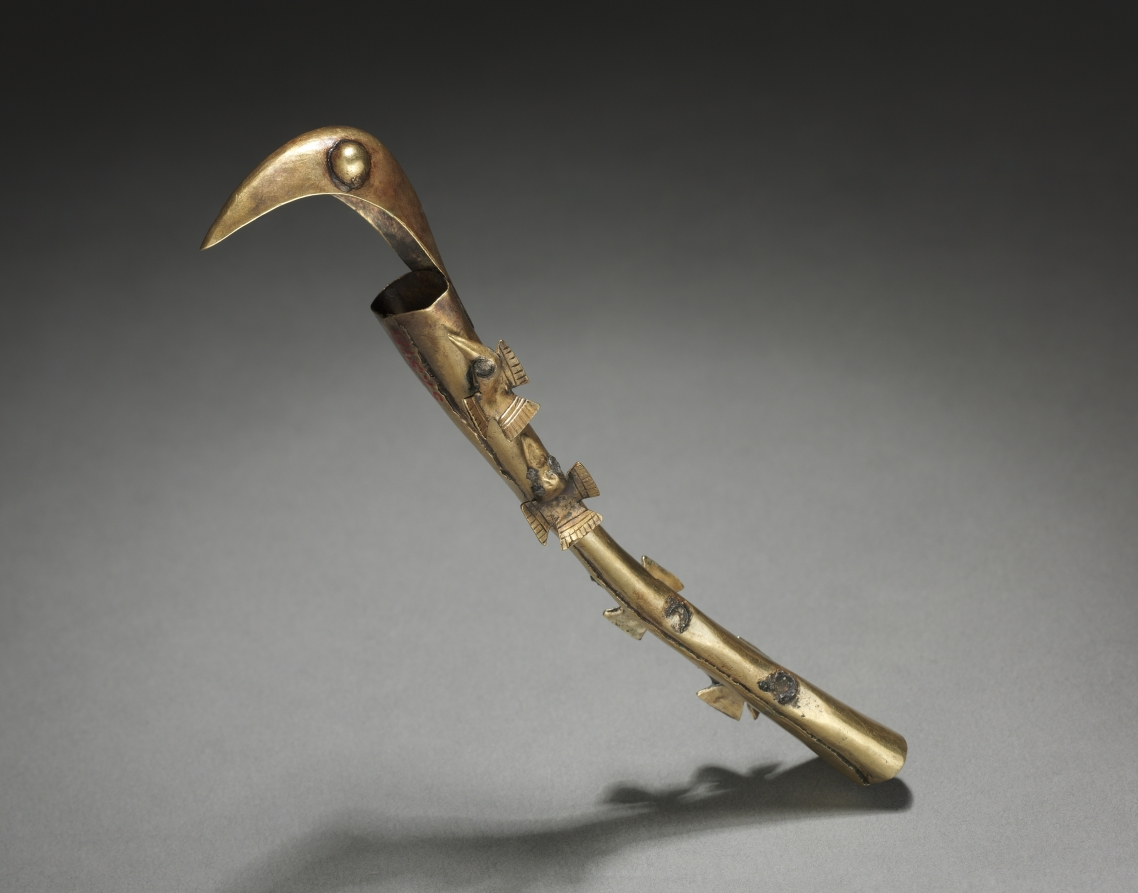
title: Flute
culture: Peru, Northern Highlands, Chavín de Huantar(?), Chavín style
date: c. 500–200 BCE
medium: hammered and cut gold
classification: Metalwork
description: There seems to be a link between Chavín religion and appearance of the Andes’ first large precious-metal objects, made using revolutionary new metallurgical processes. Chavín may have developed these technical innovations to express the inexpressible, the "wholly other" nature of its religion. In many areas, elite men and women wore the ornaments as emblems of their ties to this religion, and eventually were buried with them. These 16 objects, along with three others not in the museum’s collection, are said to have come as a group from Chavín itself.